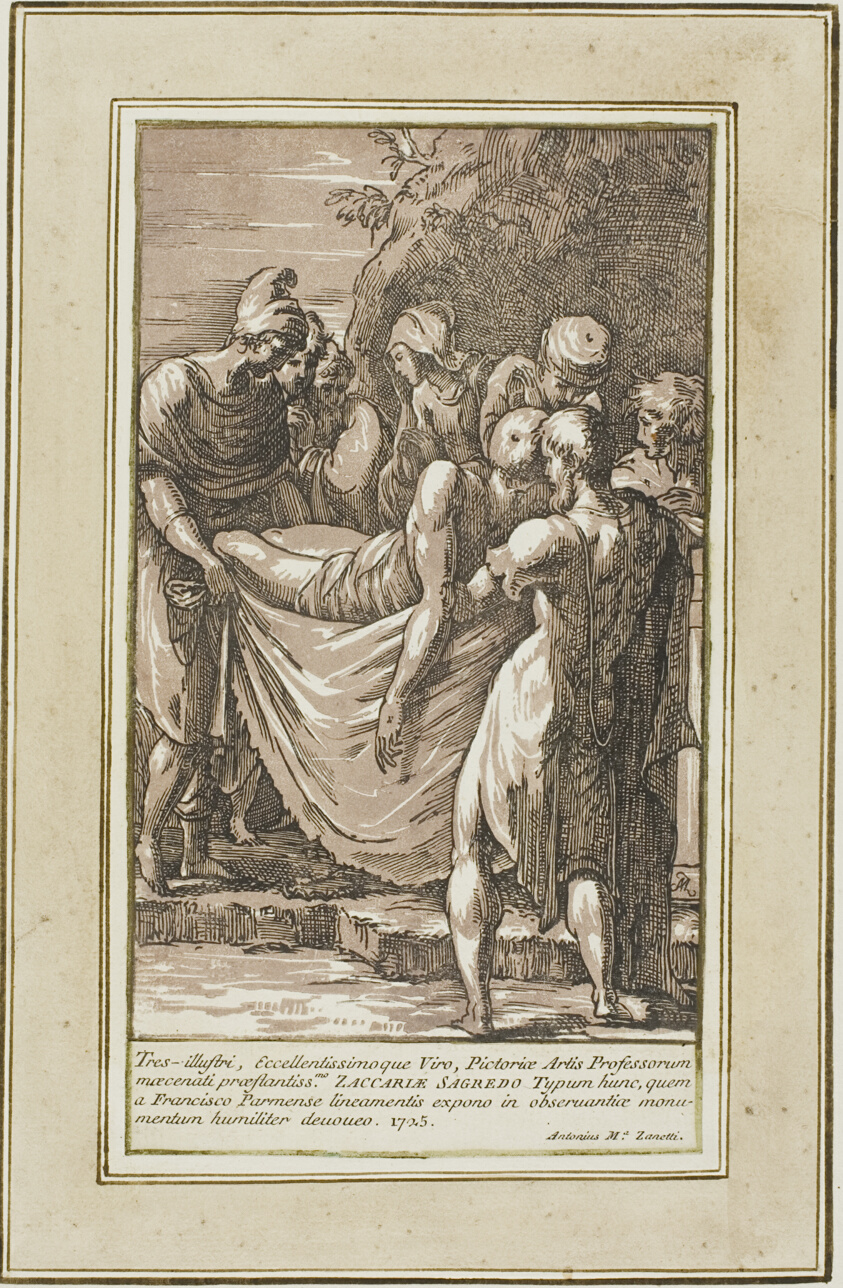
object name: Print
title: The Entombment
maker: Conte Anton Maria Zanetti (Italian, 1680–1767); after Parmigianino (Italian, 1503-1540)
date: 1725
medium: Chiaroscuro woodcut in black and brown on off-white laid paper; text in black on cream laid paper; both laid down on off-white laid paper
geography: Italy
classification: woodcut; print; prints and drawing